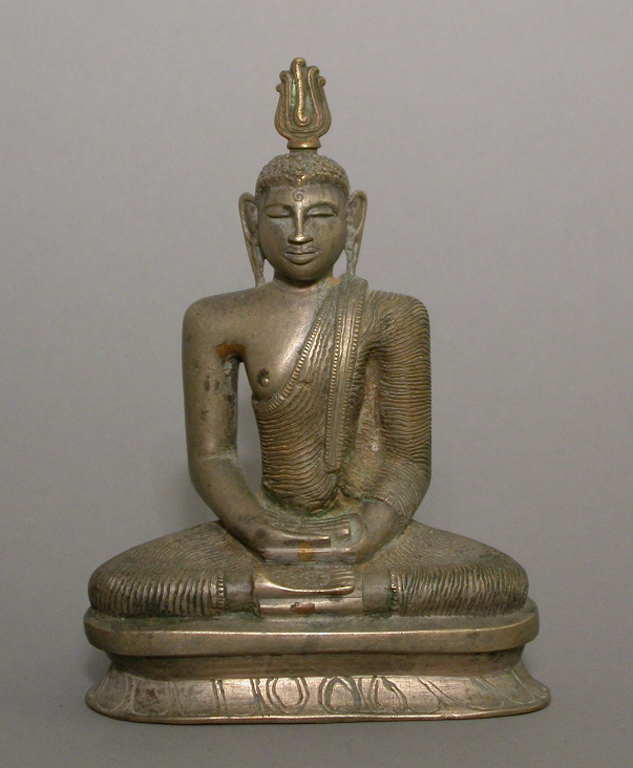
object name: Sculpture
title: Buddha Seated in Meditation (Dhyanamudra)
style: South Asian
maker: Sri Lanka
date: Kandyan period, 18th century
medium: Bronze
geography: Sri Lanka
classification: bronze; metal; sculpture; asian art